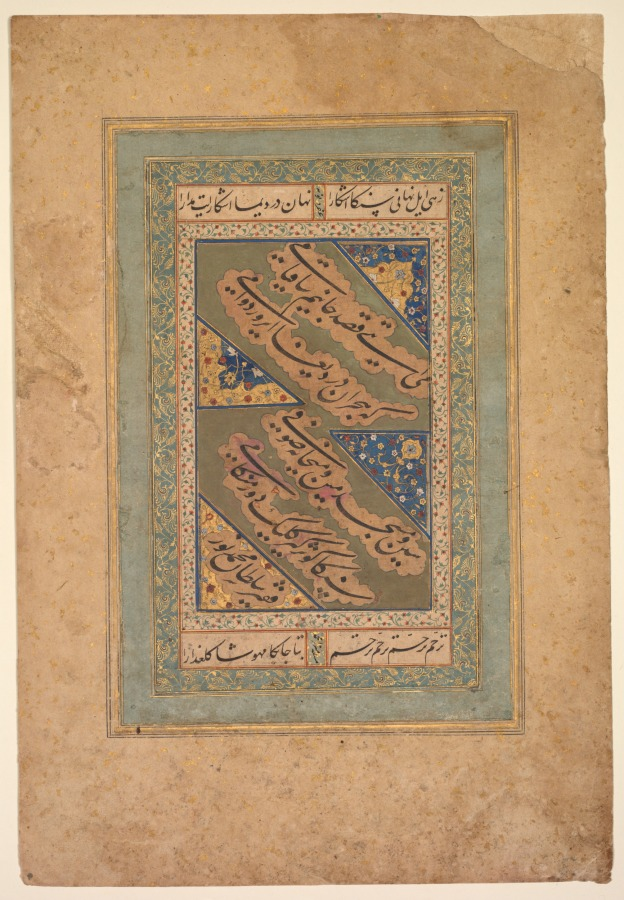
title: Calligraphy of Chaghatai Turkish Poems in Praise of Wine (verso)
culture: Mughal India, court of Akbar (reigned 1556–1605)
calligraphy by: Mirza Muhammad (probably Persian, active c. 1520s)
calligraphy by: and Sultan Muhammad Nur (Persian, c. 1472–1536)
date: c. 1500–1520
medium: Gum tempera, ink, and gold on paper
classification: Painting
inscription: Persian inscription in central small rectangular panel below, in nasta‘liq script: Copied by Mirza Muhammad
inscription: Chaghatai quatrain in center, in nasta‘liq script: The wine has made an attempt on my life,/ Since it is the wine that can wear down the pain of separation./ O Sufi! Let the mosque be for you, and the tavern for me,/ Since you need to arrive at the Spring of Kowsar, while I am in need of wine!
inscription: Persian signature in lower left triangular panel: The humble Sultan Muhammad Nur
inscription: Chaghatai verses in margins, in nasta‘liq script: Since many obscurities have become clear to you,/ So make it clear that you can put up with my secret pain./ Compassion is the cure for my wounds/ O beloved! O darling! O beauty!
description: This page of delicately illuminated calligraphy from the pre-Mughal period was mounted into a Mughal album. The poems are written in the native language of the Mughals, a form of Turkish called Chaghatai, using a flowing form of Arabic script called nasta‘liq. The Mughals self-consciously adopted Persian as their official court language, so few Chaghatai books or works of calligraphy were made for them. The quatrain in the center reads: The wine has made an attempt on my life, Since it is the wine that can wear down the pain of separation. O Sufi! Let the mosque be for you, and the tavern for me, Since you need to arrive at the Spring of Kowsar, while I am in need of wine! The Spring of Kowsar is where the righteous quench their thirst in the afterlife.